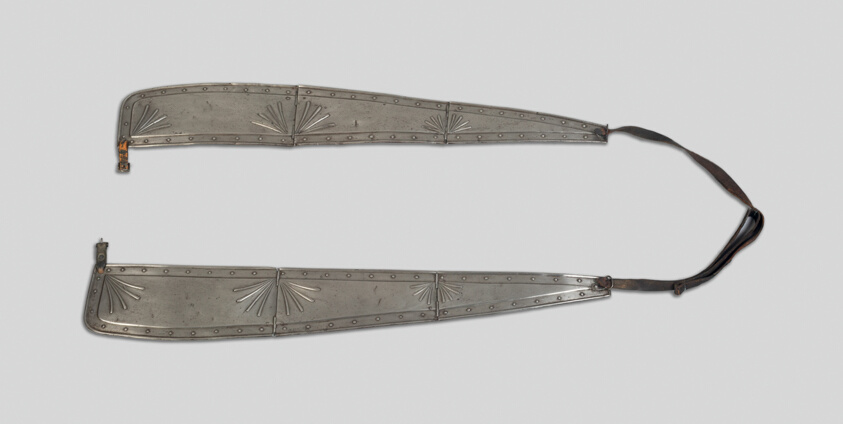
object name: Armor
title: Pair of Armored Reins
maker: German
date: 19th century in 16th century German style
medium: Steel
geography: Germany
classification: horse equipment; armor; arms and armor